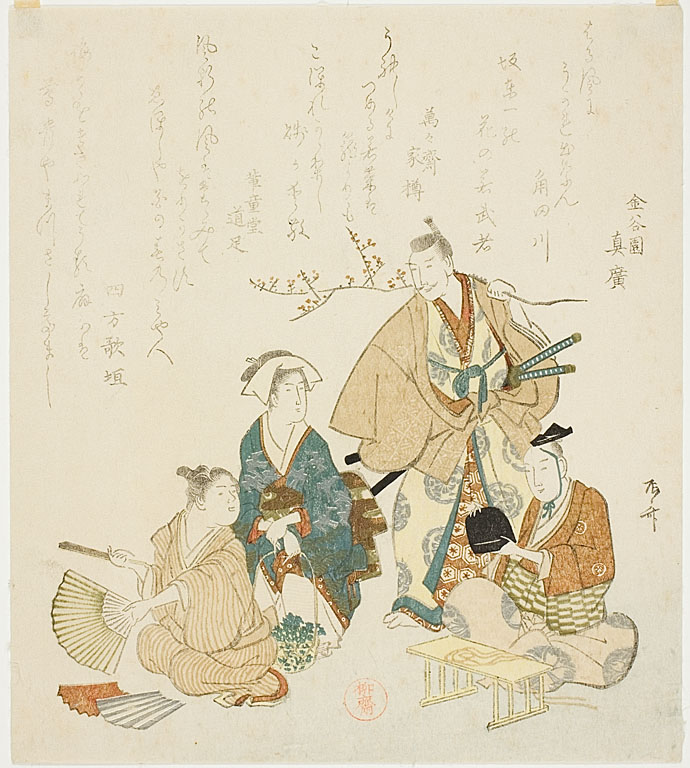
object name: Print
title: Street Scene in the Springtime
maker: Ryuryukyo Shinsai (Japanese, c. 1764-1820)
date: early 19th century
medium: Color woodblock print; surimono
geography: Japan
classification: woodblock print; print; asian art